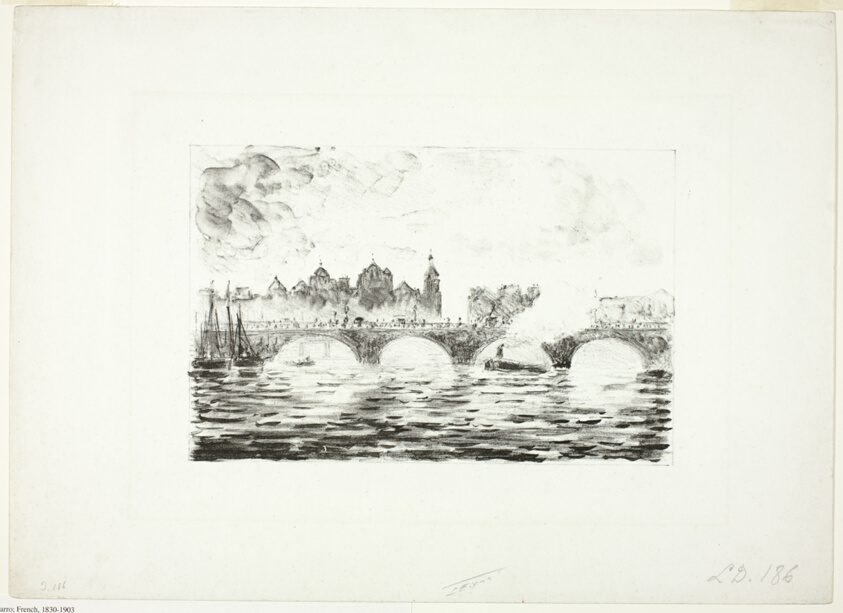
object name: Print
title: The Houses of Parliament, London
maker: Camille Pissarro (French, 1830-1903)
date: c. 1897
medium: Lithograph in black on off-white wove paper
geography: France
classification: lithograph; print; prints and drawing